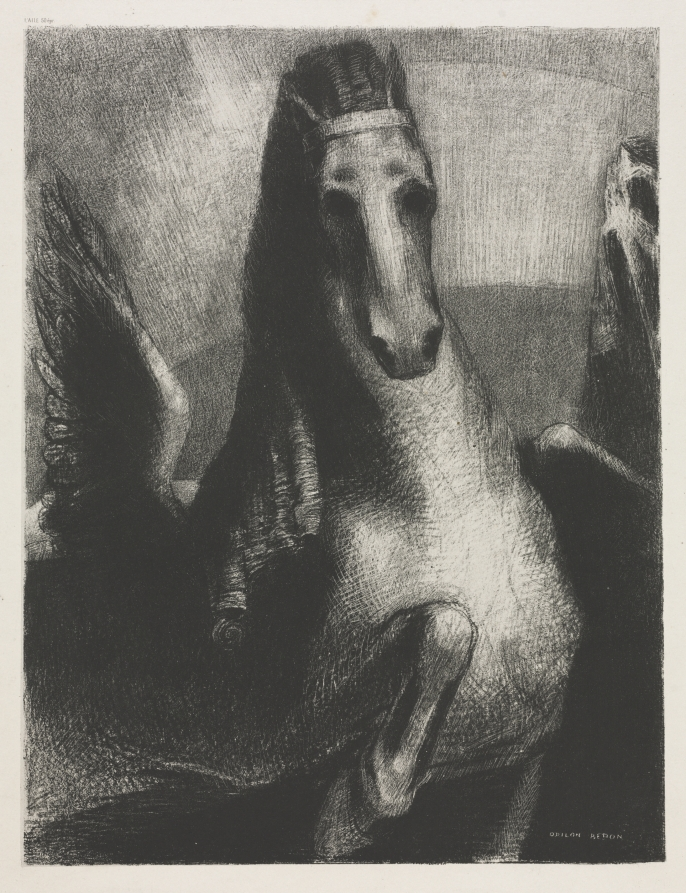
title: The Wing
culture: France, 19th century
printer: Becquet (French)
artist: Odilon Redon (French, 1840–1916)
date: 1893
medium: lithograph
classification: Print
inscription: signed on stone, bottom right: ODILON REDON; signed below image in green crayon